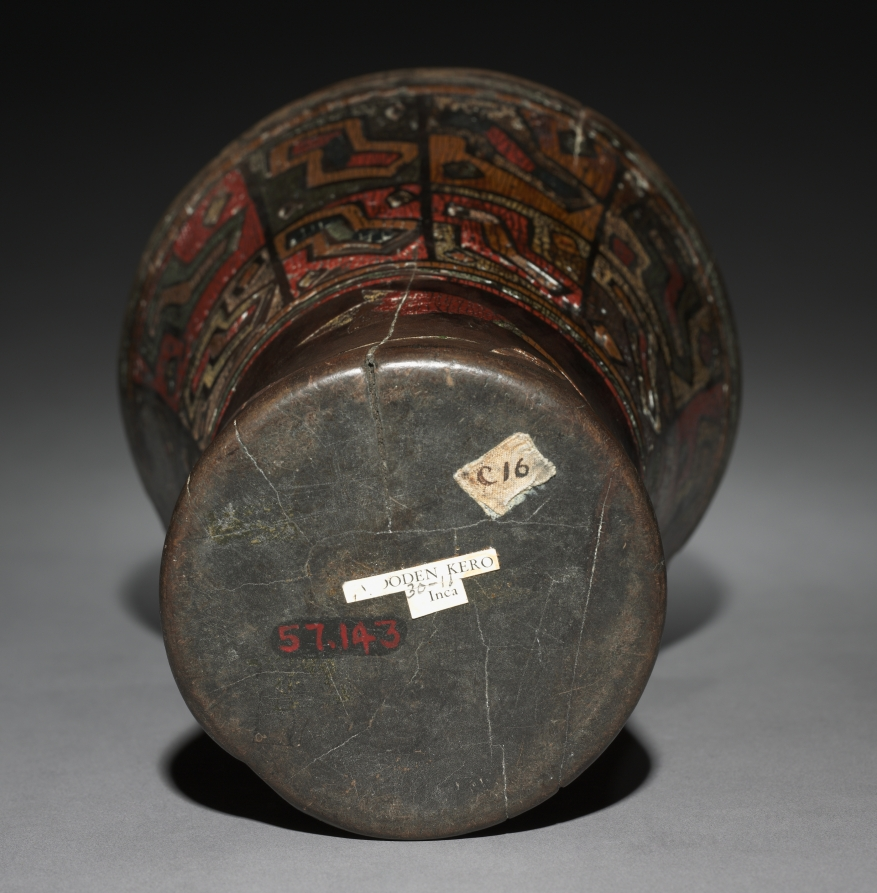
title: Kero (Waisted Cup)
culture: Peru, Colonial Inka style, 16th century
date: after 1550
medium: wood, inlaid pigments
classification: Wood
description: Keros, used to drink the maize beer chicha, were essential items of Inka statecraft. Made and used in pairs, they reflect the important Andean concept of reciprocity. Native use of keros continued in the colonial period, the date of these two examples, which come from separate pairs. The example with geometric motifs is closest to pre-conquest models. On the second, two armies converge: the Inka, dressed in tunics with waistbands, and their opponents, perhaps jungle people whose body parts are heaped in a centerpiece.